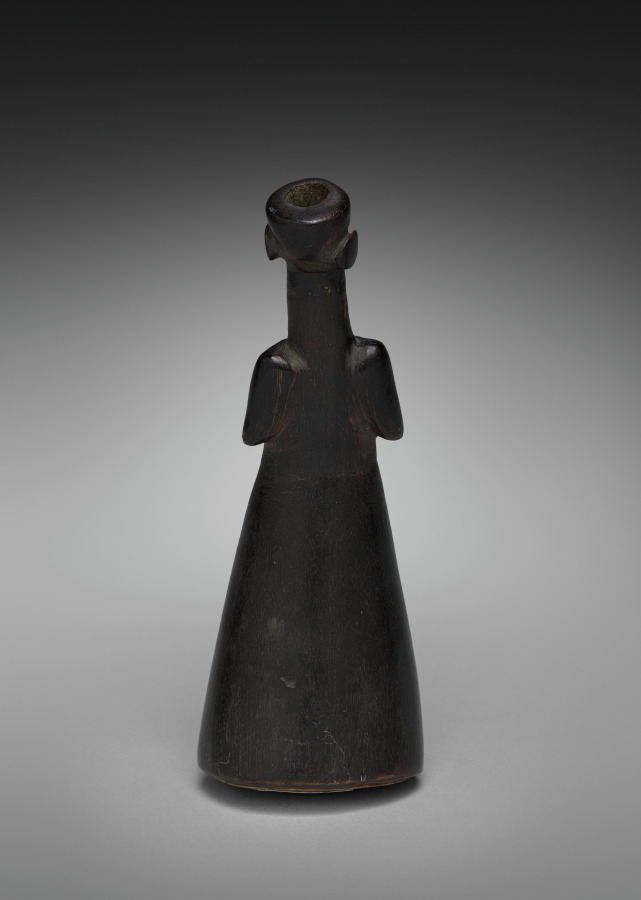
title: Snuff Container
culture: Africa, Southern Africa, Lesotho, South Sotho maker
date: 1800s-1900s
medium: Horn and wood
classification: Vessels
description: This snuff container in the form of a human (female) figure was carved from cattle horn. The form of the image follows the curve of the horn, with arms and hands held to the chest. Despite its smallish size and minimalist execution, this object demonstrates considerable expressive power. Cattle had special meaning for the pastoralist peoples of southern Africa in that it stood for the wealth and status of the individual and the group. However, similar to the ideas associated with tobacco and snuff, cattle also referred to the world of the ancestors. Snuff containers like this one had great significance for their owners and users.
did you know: The tobacco product snuff was stored in decorative, yet useful, containers like this one.